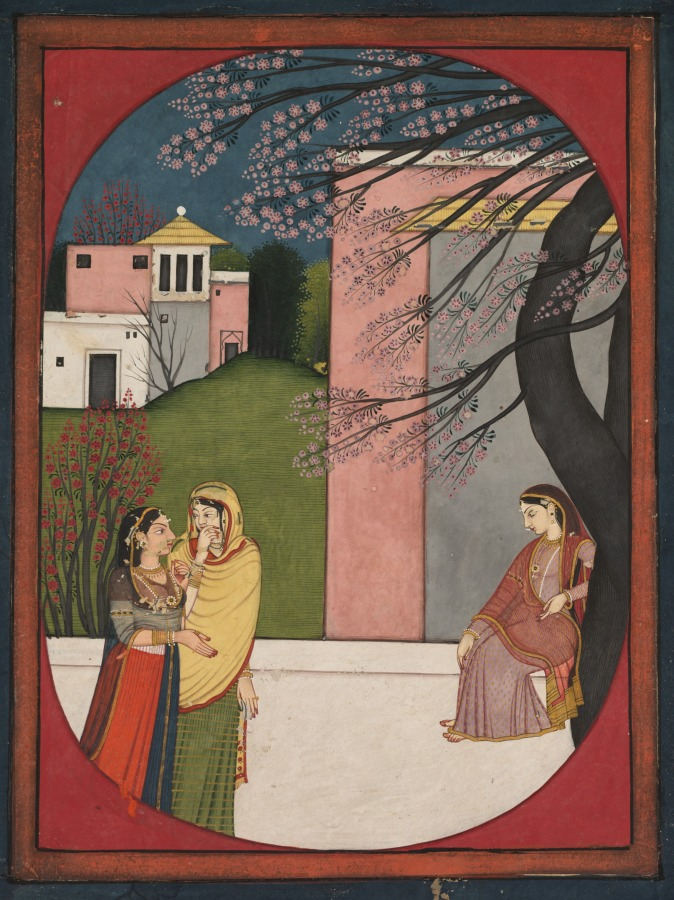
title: The lovelorn heroine, from a Sat Sai of Bihari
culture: Northern India, Pahari kingdoms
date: 1780–90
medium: Gum tempera and gold on paper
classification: Painting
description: The Sat Sai is a collection of poems mainly describing the beauty of women in a range of emotional states. The heroine of this poem sits against a tree that is in full flower, like her, but her lover is absent, and other girls walk by, gossiping. Not coincidentally, her dress matches the color of the blossoms, and no bees come to pollinate.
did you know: The Sat Sai was written for Raja Jai Singh I of Amber (r. 1625–67).